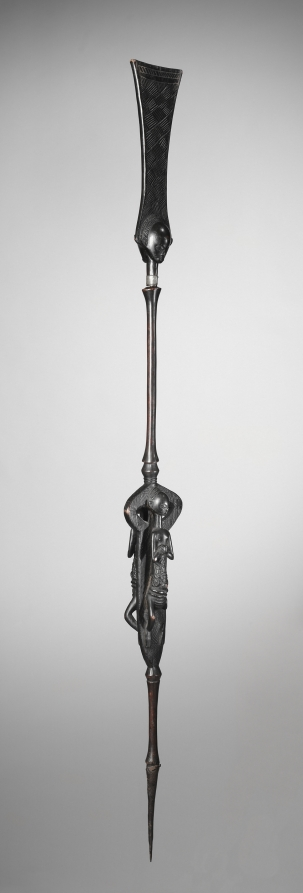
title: Staff of Office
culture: Central Africa, Democratic Republic of the Congo, Luba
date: early to mid-1800s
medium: Wood and iron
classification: Sculpture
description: Sanctified by a ritual specialist and enhanced with medicinal substances, the staff possessed supernatural qualities and was endowed with healing power. Luba staffs are among the most important regalia of Luba kings. The metal point alludes to the kingdom's stability and durability. Each staff has its own distinctive iconography to reflect regional styles. As Chief Msidi (former owner of this staff) ruled over the Yeke kingdom (and not the Luba kingdom), it begs the question of how he acquired this symbol of another realm's power.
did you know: The Yeke kingdom ruler Chief Msidi gave this as a gift of appreciation to the British missionary Frederick Stanley Arnot, whom the chief had invited to his kingdom.